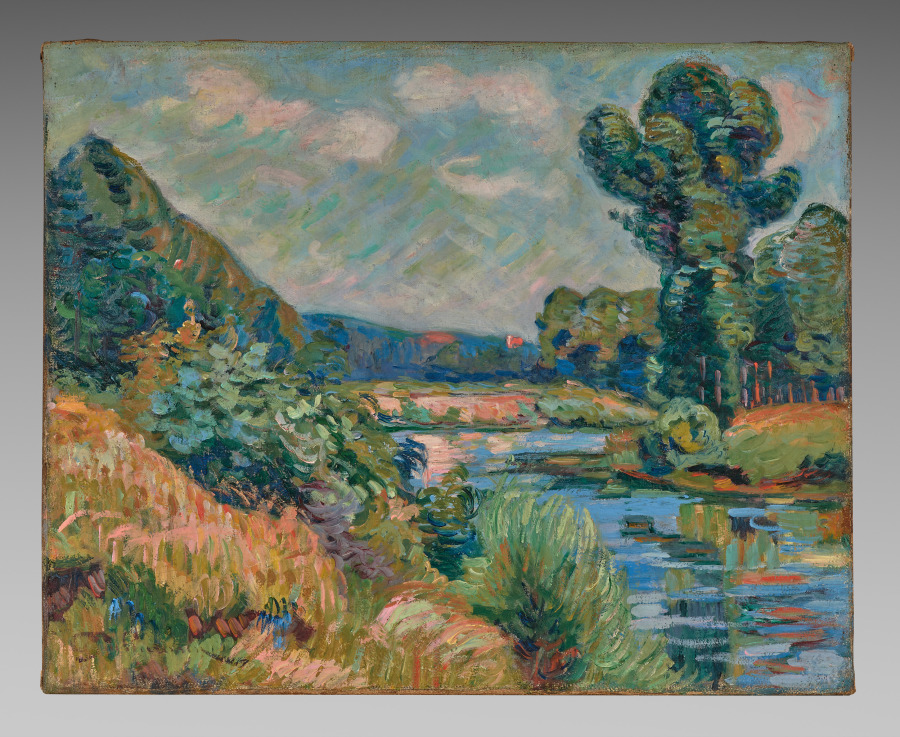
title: The Banks of the Marne at Charenton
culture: France, 19th century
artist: Armand Guillaumin (French, 1841–1927)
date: c. 1895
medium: oil on fabric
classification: Painting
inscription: Signed lower left: Guillaumin